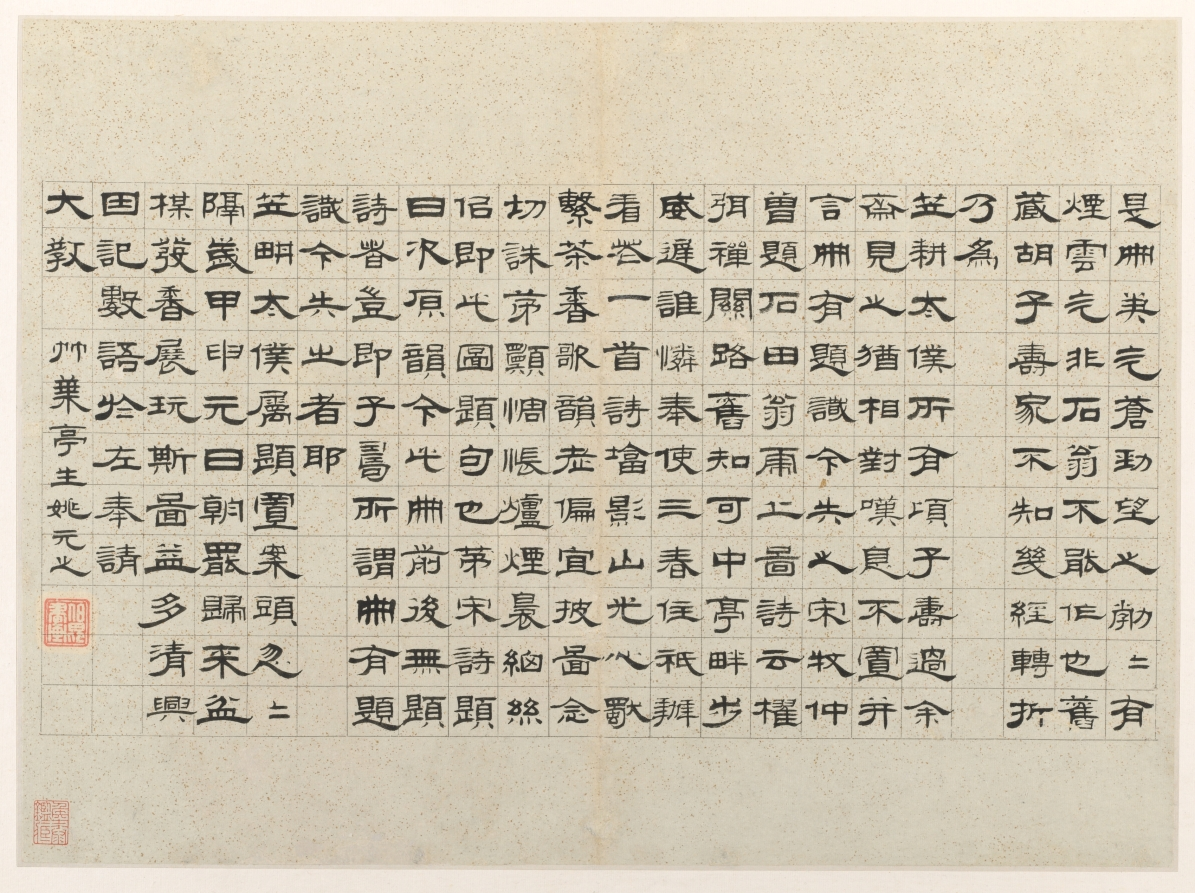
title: Twelve Views of Tiger Hill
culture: China, Ming dynasty (1368–1644)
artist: Shen Zhou (Chinese, 1427–1509)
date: after 1490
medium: Album of twelve leaves; ink or ink and slight color on paper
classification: Painting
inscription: [印] 启南; 石田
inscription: 1 colophon and 1 seal of Yao Yuanzhi 姚元之 (1776-1852). The brushwork of this album is aged and powerful. It is so vigorous that it gives you a feeling of the mist and clouds when looking at it. It could not be done by any other than the old master, Shen Zhou. Formerly the album was in the collection of Hu Zhishou's 胡之壽 family. After many changes of hands, it came finally into the possession of Ligeng 笠耕, the Keeper of the Imperial Stable [that is, Binliang 斌良, Manchurian poet-calligrapher, later the Imperial Resident in Lhasa, Tibet, 1784-1847]. Not long ago, when its former owner Zhishou came to visit me and found the album in my study, he sighed in nostalgia and told me that there were originally an inscription and colophons in the album which are now lost. Song Luo 宋犖 [zi 牧仲, 1634-1713] once had a poem by Shen Shitian on the painting of Tiger Hill. [The poem is missing from the album.] It must be a poem written for this album. However, according to Song's own title, the poem was composed after the rhymes and meter of the original poem on the album. Now there is no poem whatsoever in the frontispiece or at the end of the album. Is this what Zhishou meant - that the original colophons and inscriptions are missing? Ligeng, the Keeper of the Imperial Stable, has asked me for a colophon. The album has been left on my desk since last year. How time has passed! On the first day of the jiashen year 甲申 [1824], I returned from the Court Audience. The plum trees in the pots have started to blossom with their first fragrance. How much has this added to my enjoyment of the painting! I therefore write down a few words for your criticism. [signed] the Student of the Grass Leaf Pavilion, Yao Yuanzhi.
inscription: 3 seals of Hou Shigong 侯士恭 [late 19th–early 20th century]. (1 each on the colophon, seventh, and eleventh leaves).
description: Views of Tiger Hill depicts a historic site a few miles northwest of Suzhou. The scenes simulate a visit from arriving by boat at the foot of the mountain to climbing to Cloudy Cliff Monastery. Representations of the artist’s mature style, Shen Zhou included views in subtle colors in the suite of monochrome scenes. A Suzhou native, Shen Zhou was supported by family wealth and rejected an official career in favor of life as a retired scholar. Turning to painting in midlife, he is regarded as the founder of the Wu School of painting, with its center in Suzhou.